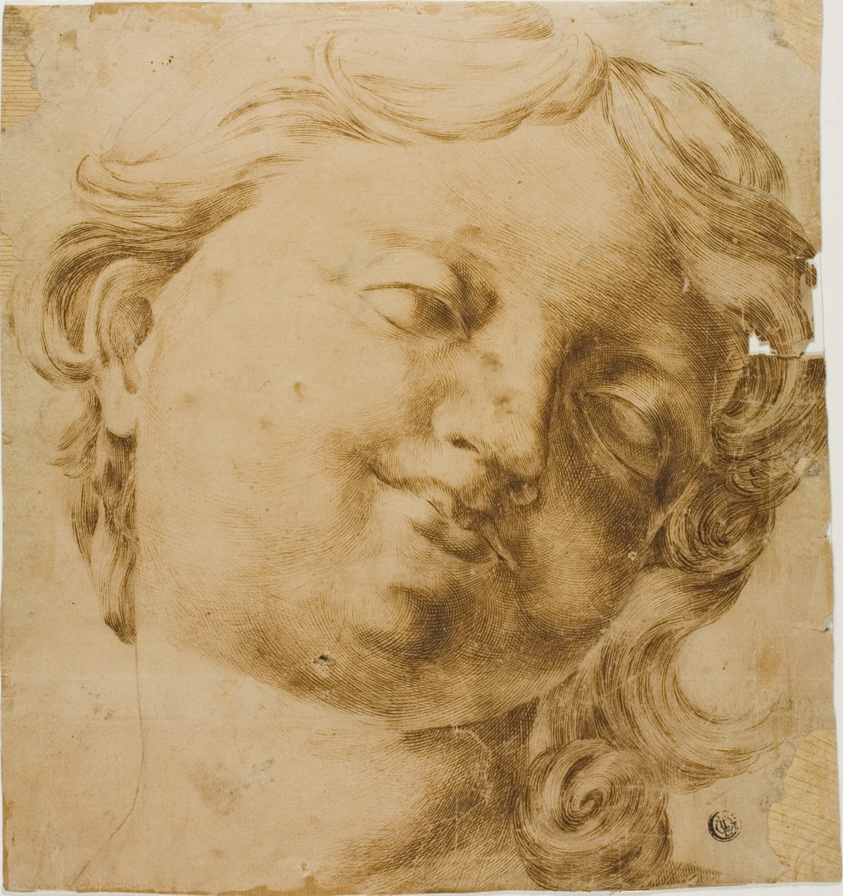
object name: Drawing and Watercolor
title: Head of a Child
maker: Possibly Domenico Peruzzini (Italian, active 1640-1661); or Raffaello Morghen (Italian, 1758/61-1833)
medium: Pen and brown ink, with traces of graphite, on tan laid paper, tipped onto off-white wove paper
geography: Italy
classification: pen and ink drawings; drawings (visual works); prints and drawing